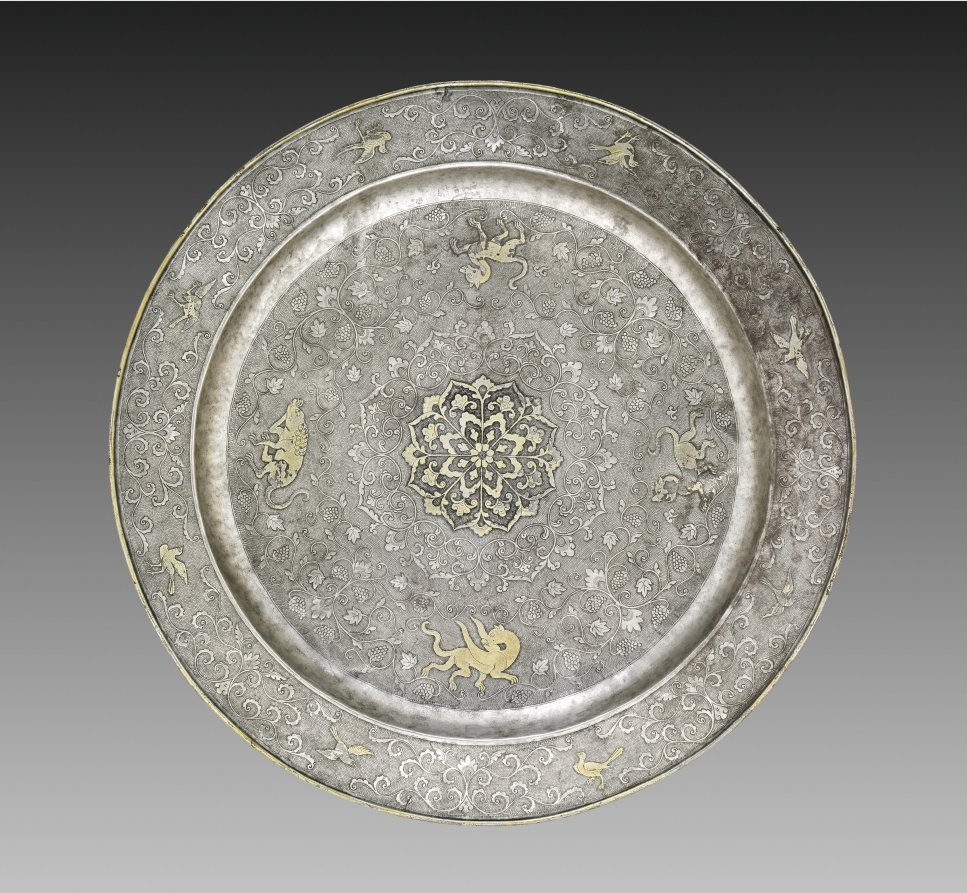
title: Footed Platter with Design of Mythical Beasts amid Grapevines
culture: China, Tang dynasty (618–907)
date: 700s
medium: silver with gilt, incised, and chased decoration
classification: Silver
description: Precious Sassanian and Central Asian metalwork had been imported to China as early as the 4th and 5th centuries as a result of wars and prosperous trade along the Silk Road. With the influx of foreign metalworkers to cosmopolitan Tang China, the techniques of sheet metalworking were introduced to the Chinese. This silver vessel demonstrates the effects of such east-west exchanges along the Silk Road. Its decoration with intricate gilt, incised and chased designs against a ring-punched ground is of a particularly high standard.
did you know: The footed tray, a foreign shape, is decorated with fantastic creatures frolicking among grapevines, a motif borrowed from Roman art.